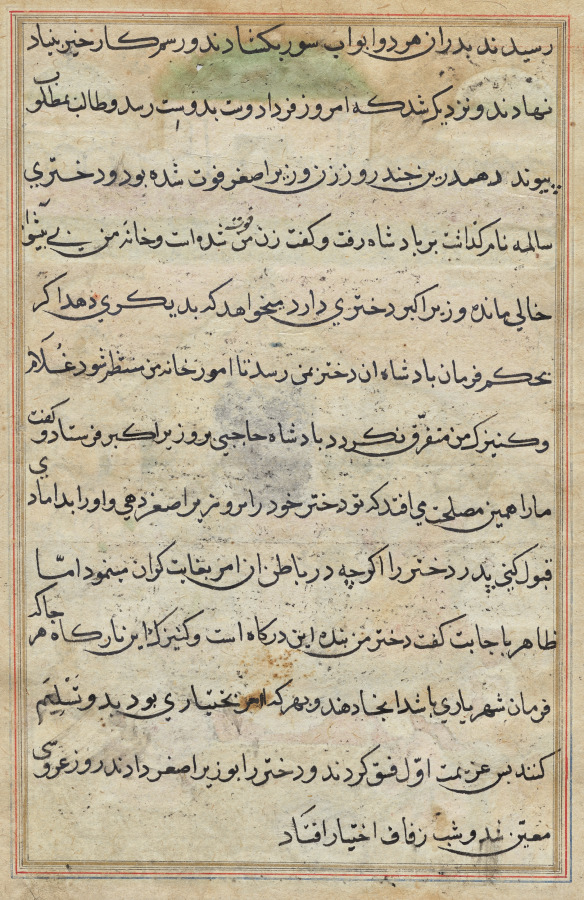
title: Page from Tales of a Parrot (Tuti-nama): text page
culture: Mughal India, court of Akbar (reigned 1556–1605)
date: c. 1560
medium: gum tempera, ink, and gold on paper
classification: Painting